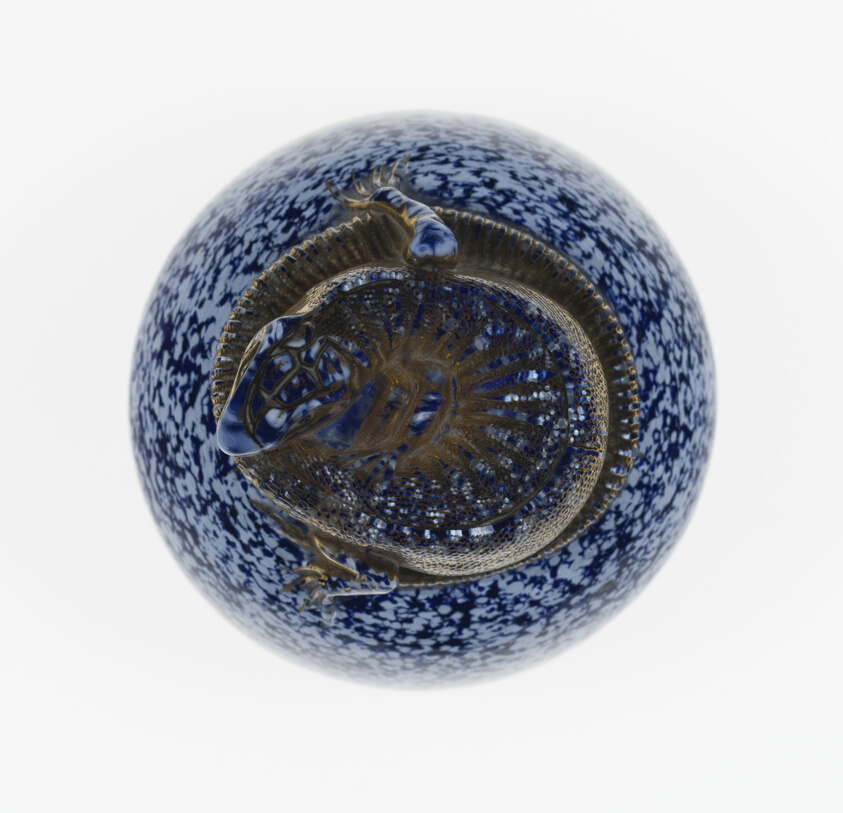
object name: Glass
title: Paperweight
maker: Saint-Louis Glassworks (Cristalleries de Saint-Louis); Lorraine, France, founded 1586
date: c. 1845–60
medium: Glass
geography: Saint-Louis-lès-Bitche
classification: paperweight; glass